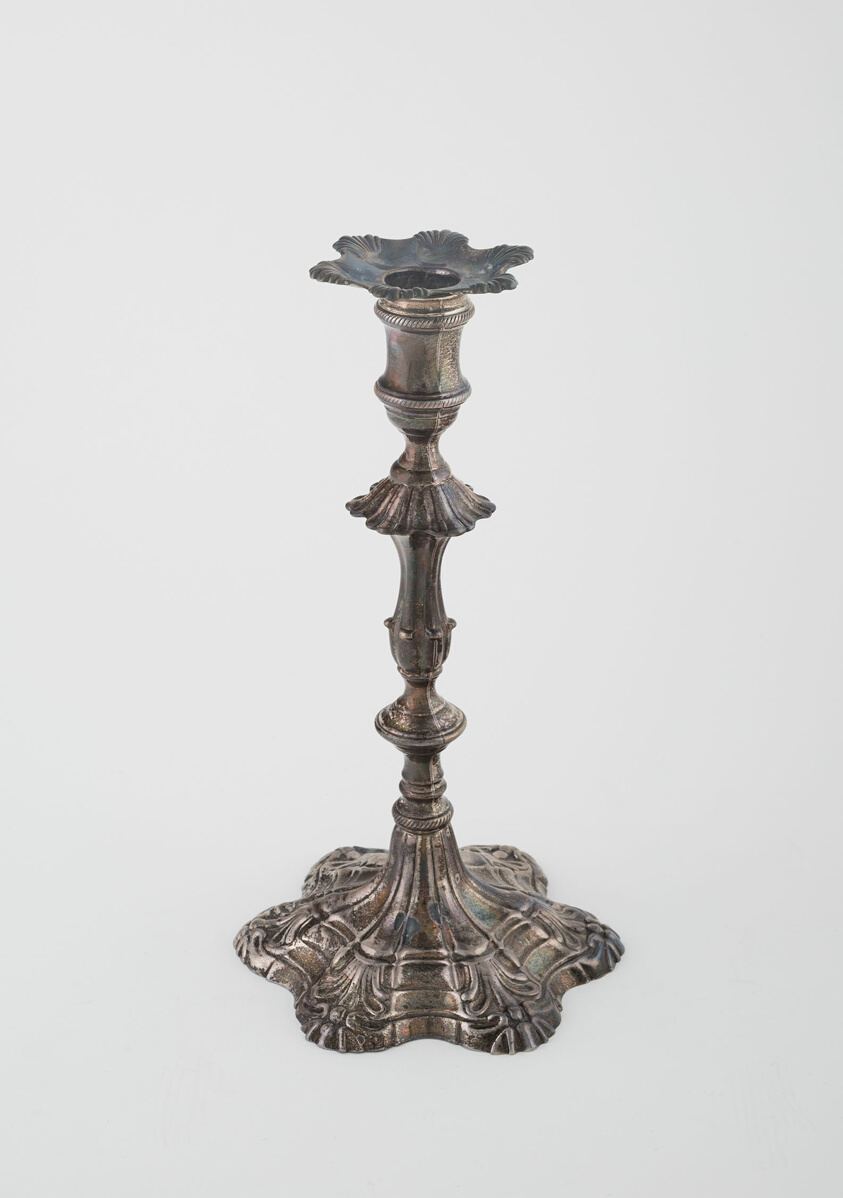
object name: Metalwork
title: Candlestick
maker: Probably Ebenezer Coker; English, 1738-1783; London, England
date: 1762/63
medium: Silver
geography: London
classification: candleholder - candlestick; candleholder; silver; metalwork; european decorative arts